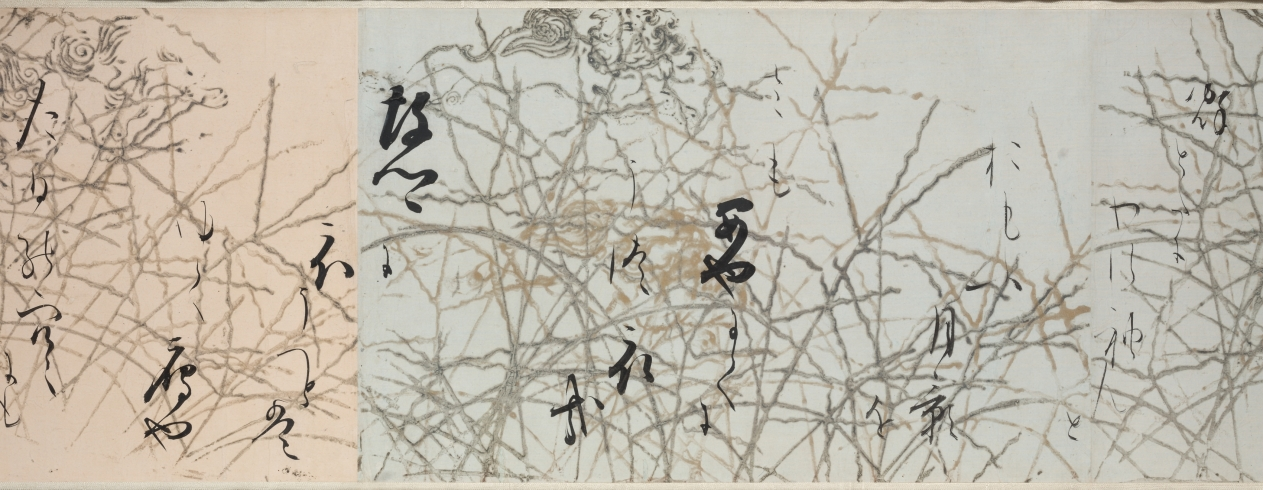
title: Selections from the New Collection of Japanese Poems from Ancient and Modern Times (Shinkokin wakashū) with Printed Designs of Chinese Lions and Crab Finger Grass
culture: Japan, Edo period (1615–1868)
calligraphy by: Hon'ami Kōetsu (Japanese, 1558–1637)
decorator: Tawaraya Sōtatsu (Japanese, c. 1570–c. 1640)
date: early 1600s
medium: handscroll; ink, gold, and silver on paper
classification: Calligraphy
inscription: Seal: 光悦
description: Hon’ami Kōetsu was a calligrapher and craftsman who frequently collaborated with the painter Tawaraya Sōtatsu, considered the first master of the Rinpa school. Kōetsu brushed seven poems from the autumn section of a poetry anthology onto dyed paper with motifs designed and printed in gold and silver by Sōtatsu.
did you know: Before becoming a master painter of screens, Tawaraya Sōtatsu painted fans.